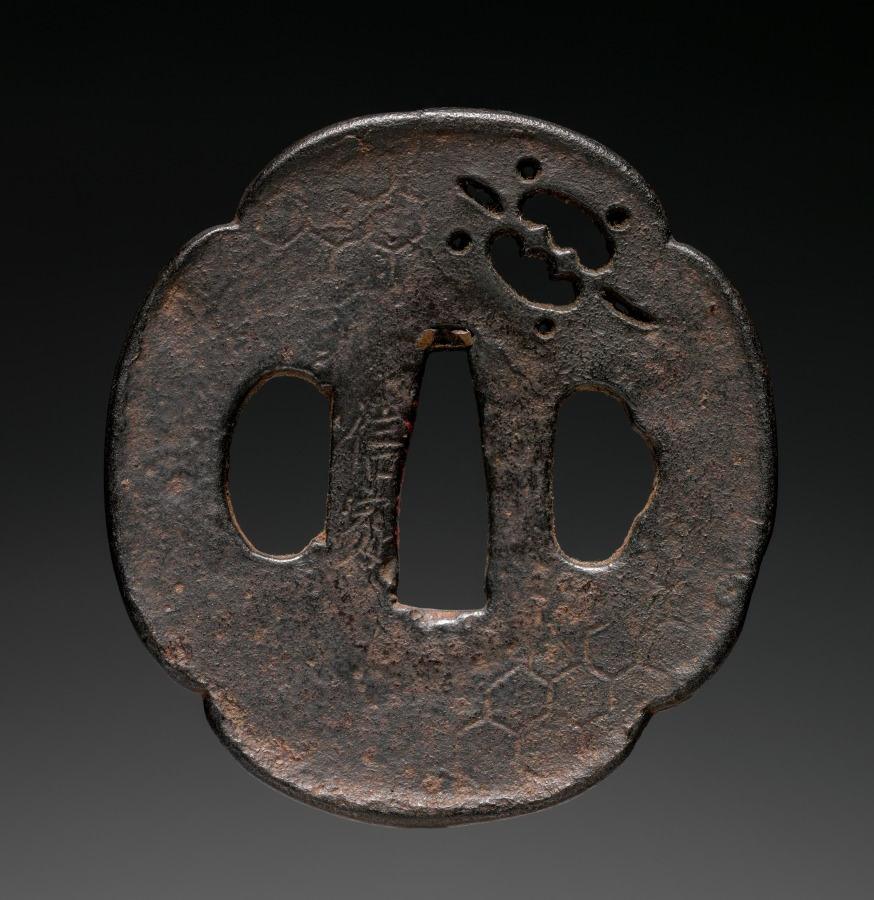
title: Sword Guard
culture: Japan, Muromachi period (1392–1573)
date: 1500s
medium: iron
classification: Arms and Armor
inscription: Signature: Nobuiye